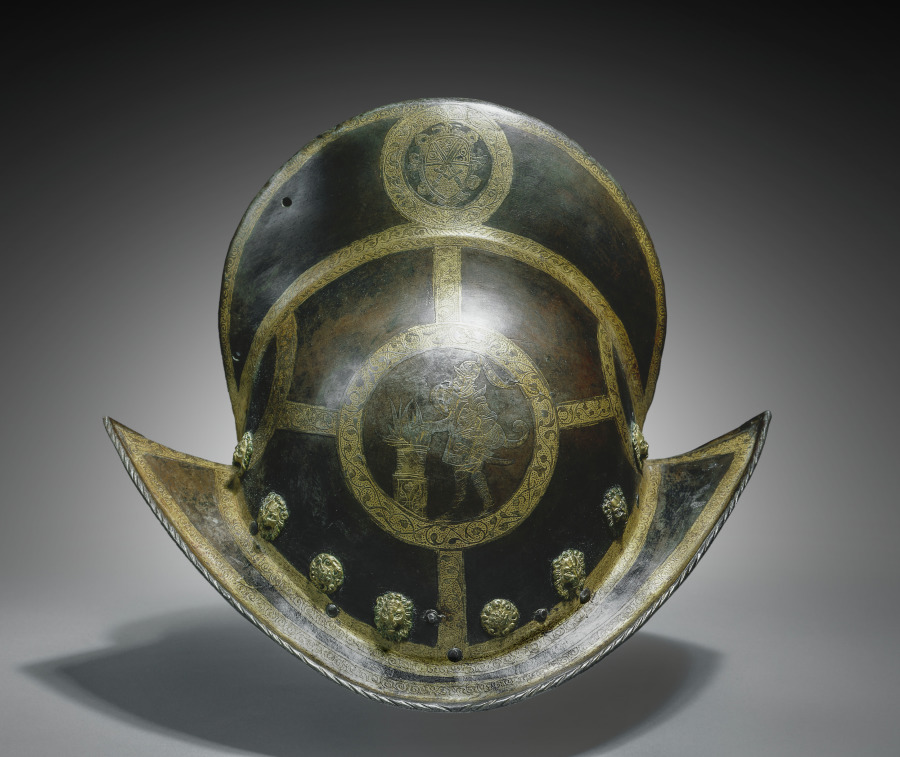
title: Morion of the State Guard of Elector Christian I of Saxony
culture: Germany, Nuremberg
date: c. 1580–91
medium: russet steel, etched and gilded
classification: Arms and Armor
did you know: Christian I of Saxony outfitted his palace guards with black and yellow outfits topped off with a coordinated helmet like this one to highlight his grandeur and refinement. The Saxon coat of arms is also proudly displayed on the crest of this helmet.